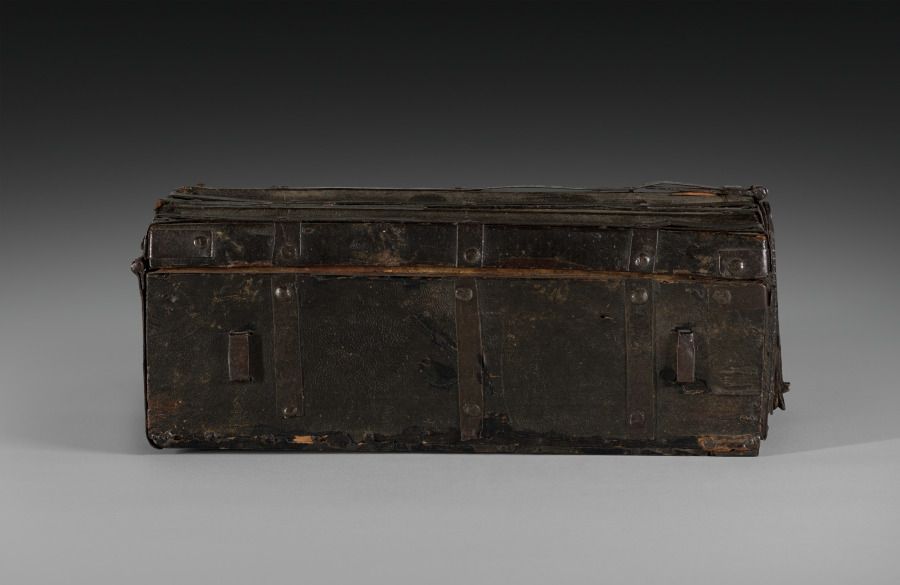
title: Coffret with Woodcut of Saint Veronica's Vernicle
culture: Coffret: France, probably Paris; Woodcut: Germany, Augsburg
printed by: Hans Burgkmair the Elder (German, 1473–1531)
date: Coffret: c. 1515; Woodcut: c. 1509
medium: Wood, leather, iron, textile, woodcut with stenciled coloring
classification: Print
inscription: SALVE. XPI. EFFIGIES. SACERRI[M]A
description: This remarkable object is thought to have functioned as a traveling case to keep small valuables and books, as well as a provisional altar. Made in France around 1515, the interior lid is affixed with a devotional woodcut made in Germany, imported, and colored for the purpose. Featuring an image of the veil of Saint Veronica, the text at the bottom of the woodcut guides the user in prayer to the holy image of Christ’s face which has been miraculously imprinted on the veil, an action that held promise of indulgences (a reduction in one’s punishment for sins). Presumably, the owner carried the box on a journey, retrieved a prayer book from inside, and propped it open in order to practice daily prayers.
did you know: A secret compartment on the top lid of this coffer may have held a relic, consecrated host, or valuable document.